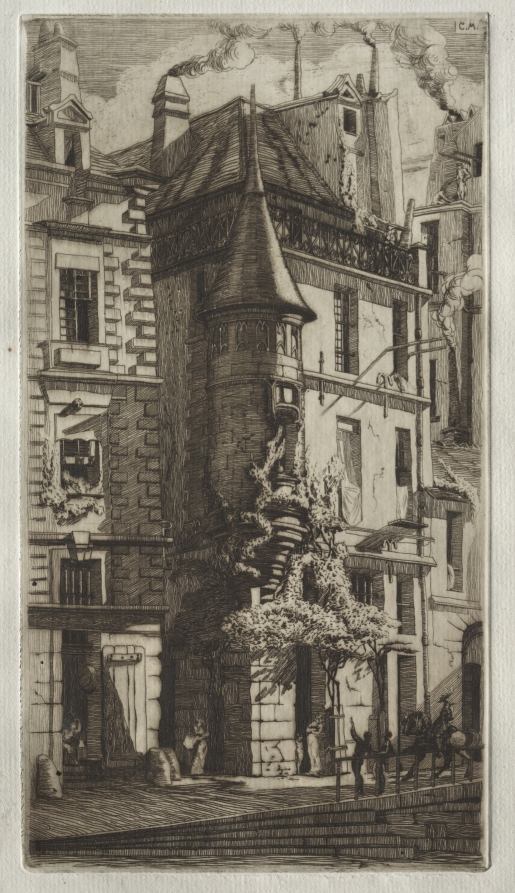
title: Tourelle de la rue de la Tixéranderie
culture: France, 19th century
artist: Edmond Gosselin (French)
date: c. 1881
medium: etching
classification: Print